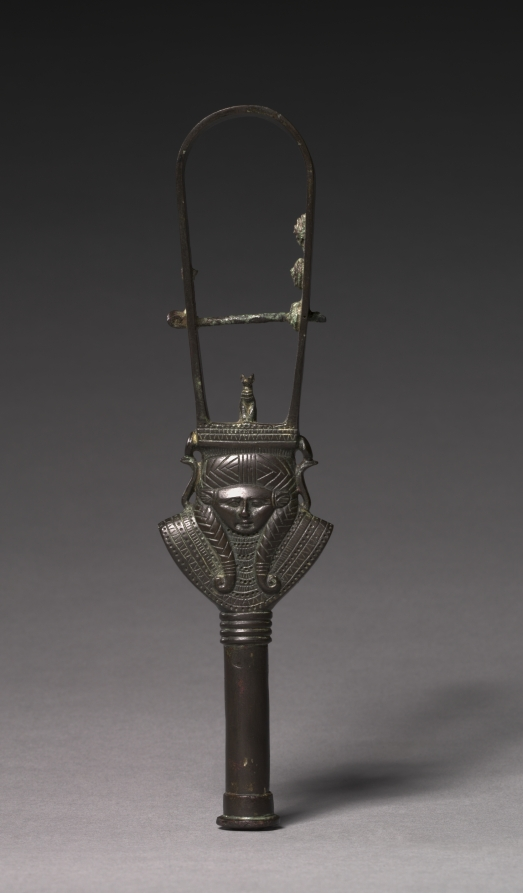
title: Arched Sistrum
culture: Egypt, Late period (715–332 BCE), Dynasty 30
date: 380–343 BCE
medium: bronze, hollow cast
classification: Implements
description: A sistrum is a musical rattle. Metal disks strung on wires along the arched upper end of the sistrum produced a rustling sound that was supposed to have a calming effect on the nerves of various deities, especially the goddesses Hathor and Bastet. Appropriately, this example is decorated with a Hathor head (a woman with cow’s ears) and a cat (the image of Bastet). These instruments are particularly associated with women, who played them as members of a temple choir.